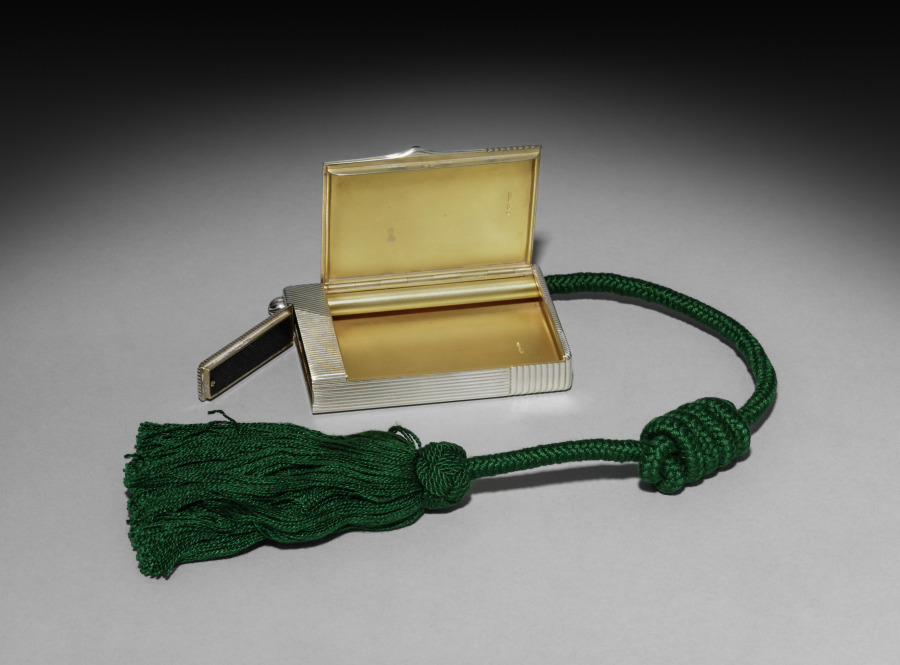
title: Cigarette Case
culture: Russian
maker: House of Fabergé (Russian, 1842–1918)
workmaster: August Hollming (Finnish, 1854–1913)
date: 1911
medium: Silver, ruby, textile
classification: Silver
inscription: Signed with initials of the workmaster August Hollming (active 1880-1913)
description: Fabergé offered variations of a cigarette case model such as this example, using different materials, surface treatments, and ornamentation. Accommodating individual clients’ wishes, the firm would also add a family insignia or additional decoration. The finely ridged surface demonstrates the superb handling of the precious metal by August Hollming, a Finnish master who worked for Fabergé in Saint Petersburg.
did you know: The cigarette case also includes a compartment for a match striker.